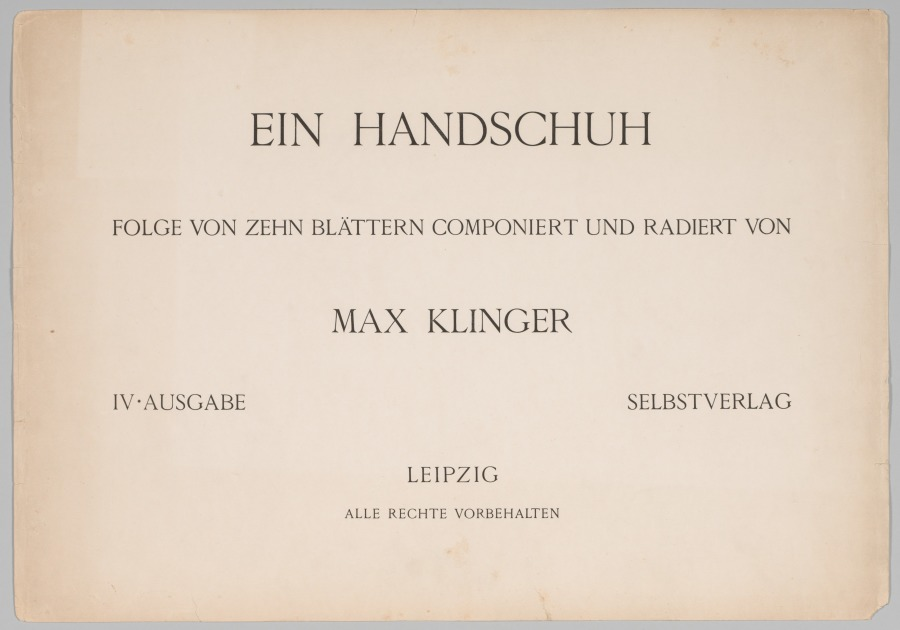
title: A Glove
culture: Germany, 19th century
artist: Max Klinger (German, 1857–1920)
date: 1880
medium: etching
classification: Print